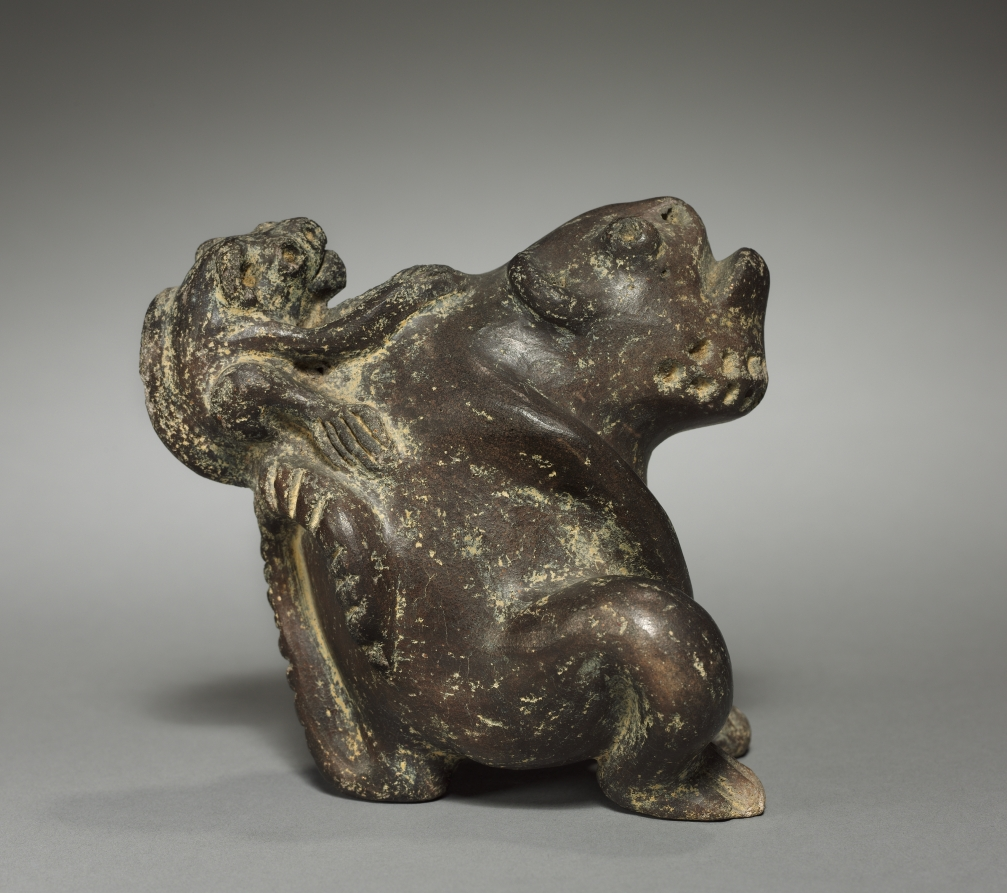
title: Jar in Shape of Grotesque Beasts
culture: Colombia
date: before 1921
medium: pottery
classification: Ceramic